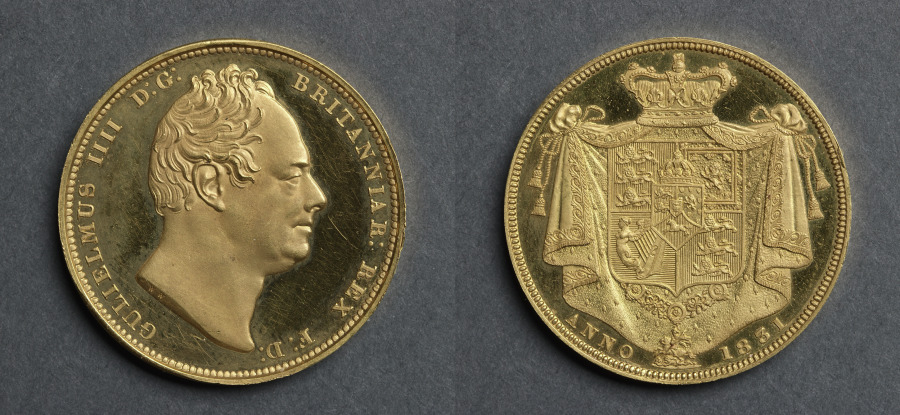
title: Two Pound Piece: George IV (obverse); Shield of Arms (reverse)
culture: England, William IV, 1830-1837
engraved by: Jean Baptiste Merlen (French, 1769–1850)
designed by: William Wyon (British, 1795–1851)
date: 1831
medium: gold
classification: Coins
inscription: BRITANNIAR: REX F: D: GULIELMUS IIII D: G:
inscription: ANNO 1831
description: The two-pound piece in this reign was only struck as a pater in 1831. Again, as in the last reign, a limited number of proof sets were struck, and this coin was included in the sets. Since it never went into circulation it is properly called a pattern.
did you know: This is the largest gold coin issued during his brief reign.